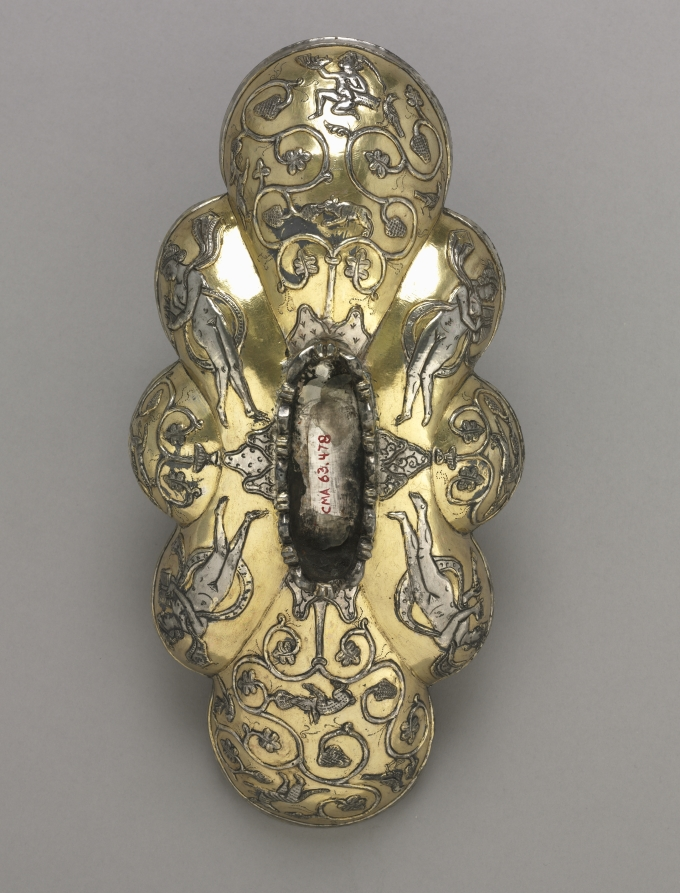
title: Bowl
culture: Iran, Sasanian Empire (224–651 CE)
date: 300–500 CE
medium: silver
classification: Metalwork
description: The decoration on this bowl—a vine with a little nude, accompanied by musicians drinking wine from a rhyton—is related to the Hellenistic cult of Dionysos, or Bacchus, which was brought to Iran by the Greeks and became absorbed into the cult of Anahita.